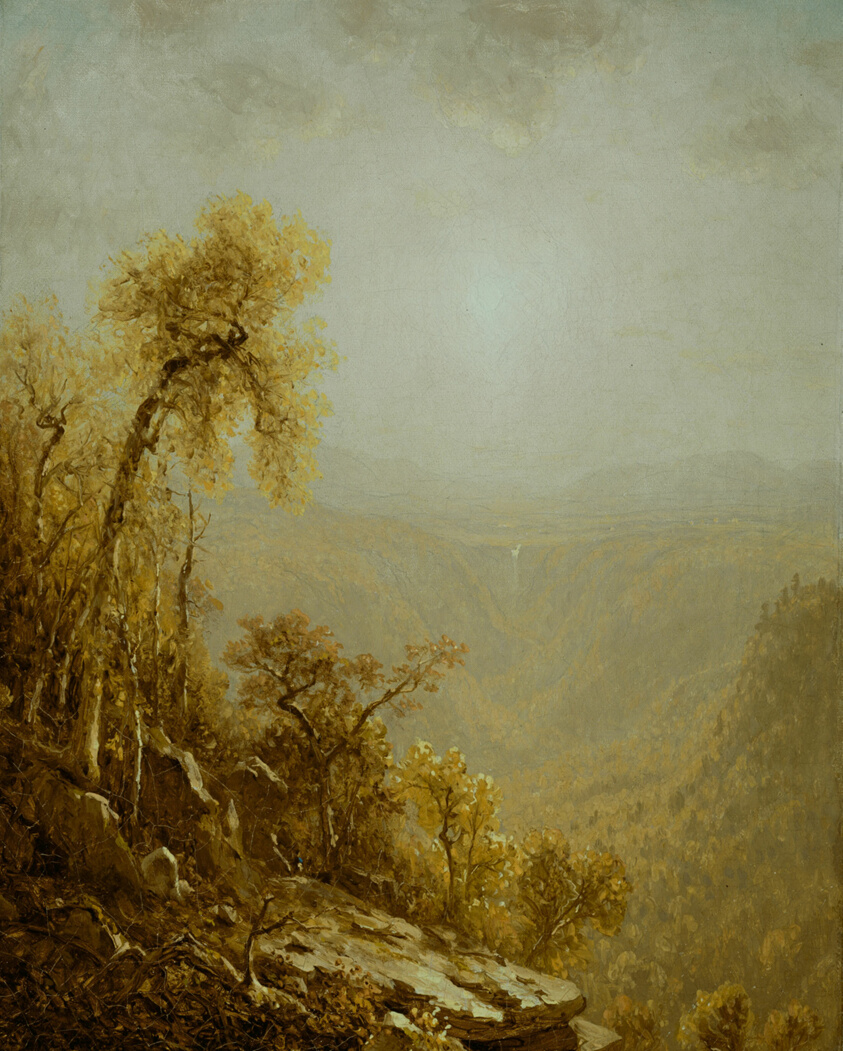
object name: Painting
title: Kauterskill Clove, Catskill Mountains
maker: Sanford Robinson Gifford (American, 1823–1880)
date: 1880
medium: Oil on canvas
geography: United States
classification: painting; american arts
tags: landscapes